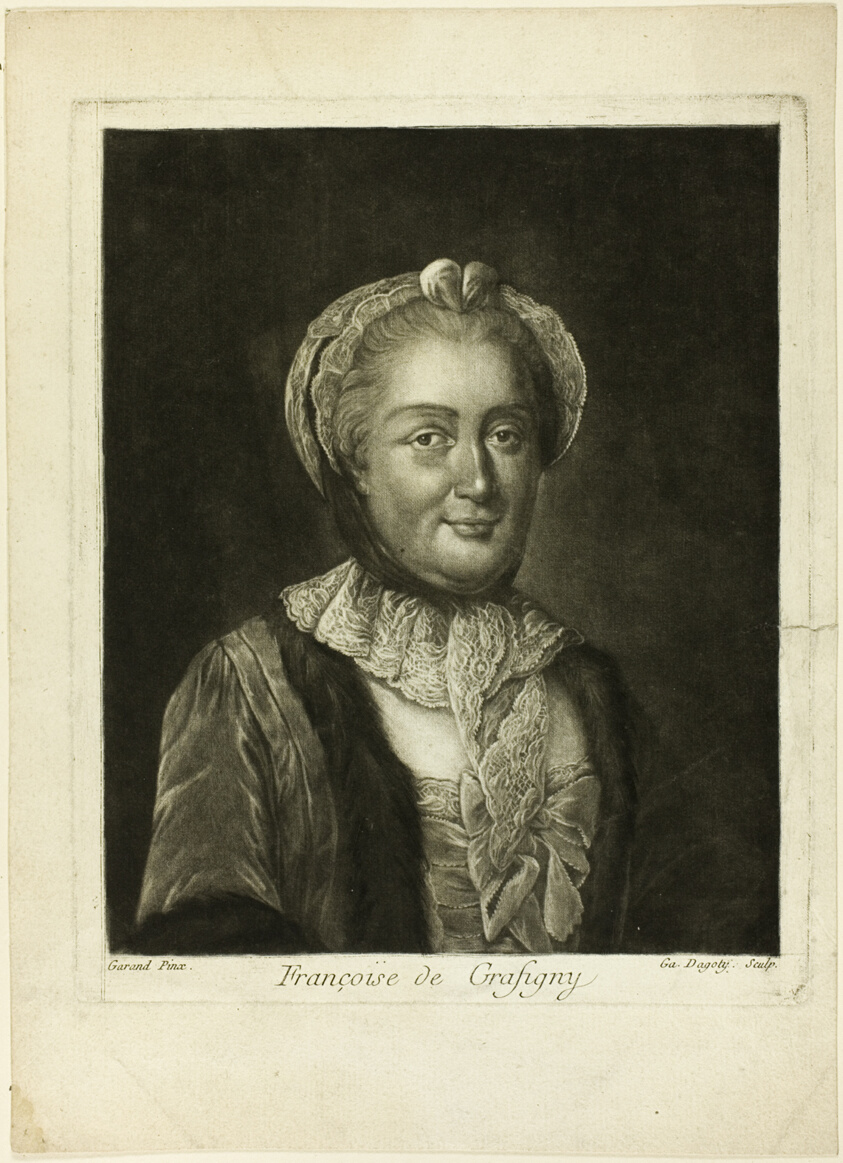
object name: Print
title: Françoise de Grasigny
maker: Jean Baptiste André Gautier d'Agoty (French, 1740-1786); possibly after Edme Garand (French, active 1752); or possibly after Jean-Baptiste Garand (French, died c. 1780)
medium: Mezzotint on ivory laid paper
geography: France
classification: mezzotint; print; prints and drawing